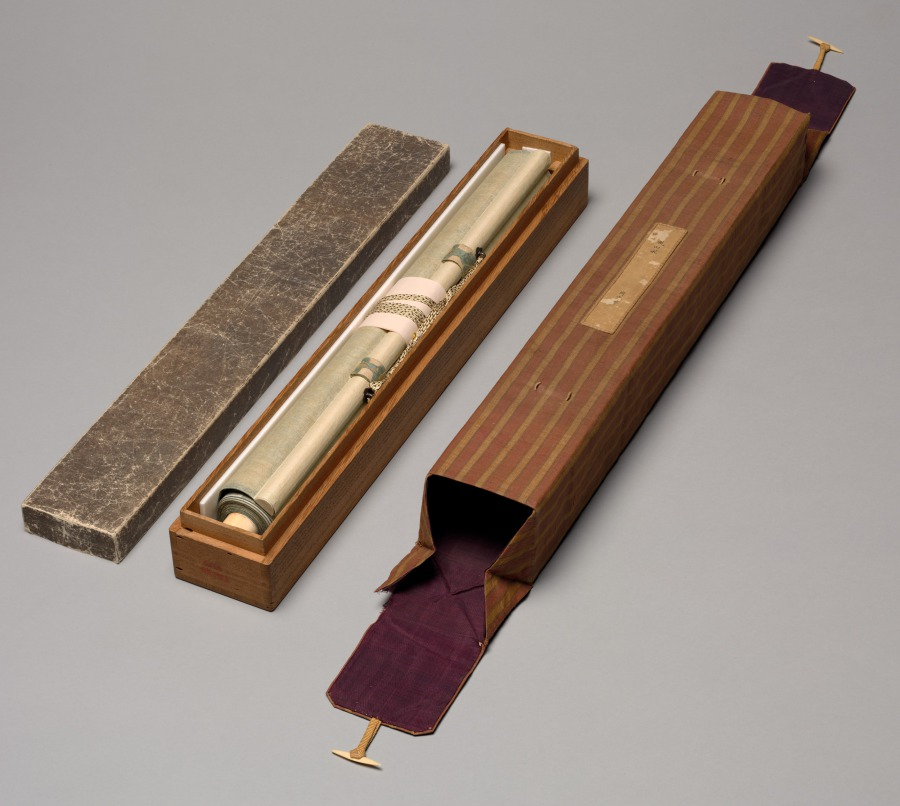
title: Windy Landscape with Sailboat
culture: Japan, Muromachi period (1392–1573)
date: mid-1400s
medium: hanging scroll; ink on paper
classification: Painting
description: Windy Landscape depicts the humble waterside retreat of an official retired from government service. For government officials, retreating from the city to a remote locale was the ideal retirement, though difficult to attain. In this scroll the retiree gazes out over the watery expanse past the sailboat to the mist-covered mountain in the far distance. The artist has achieved this depth of composition through carefully placed brushstrokes and ink washes.